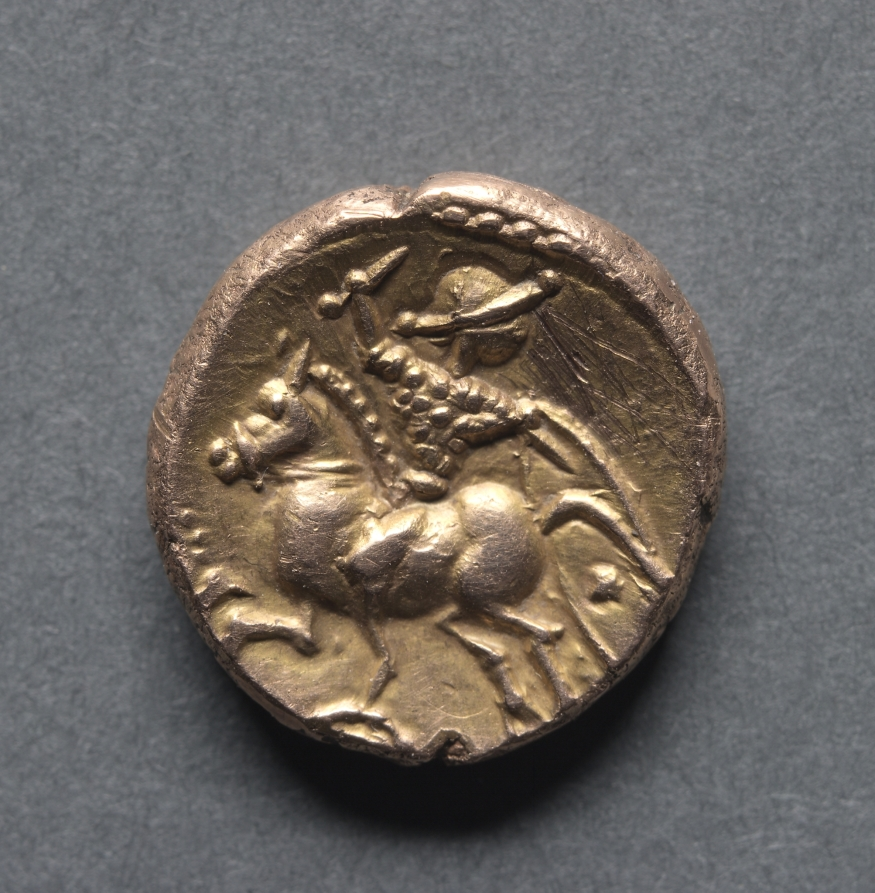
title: Tasciovanus Stater: Horse and Armed Rider (reverse)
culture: England, Catuvellauni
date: c. 20 BCE–10 CE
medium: gold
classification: Coins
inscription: "TASCIOV RICON" in two compartments of a tablet with curved ends placed across a five-fold wreath of plain and corded lines.